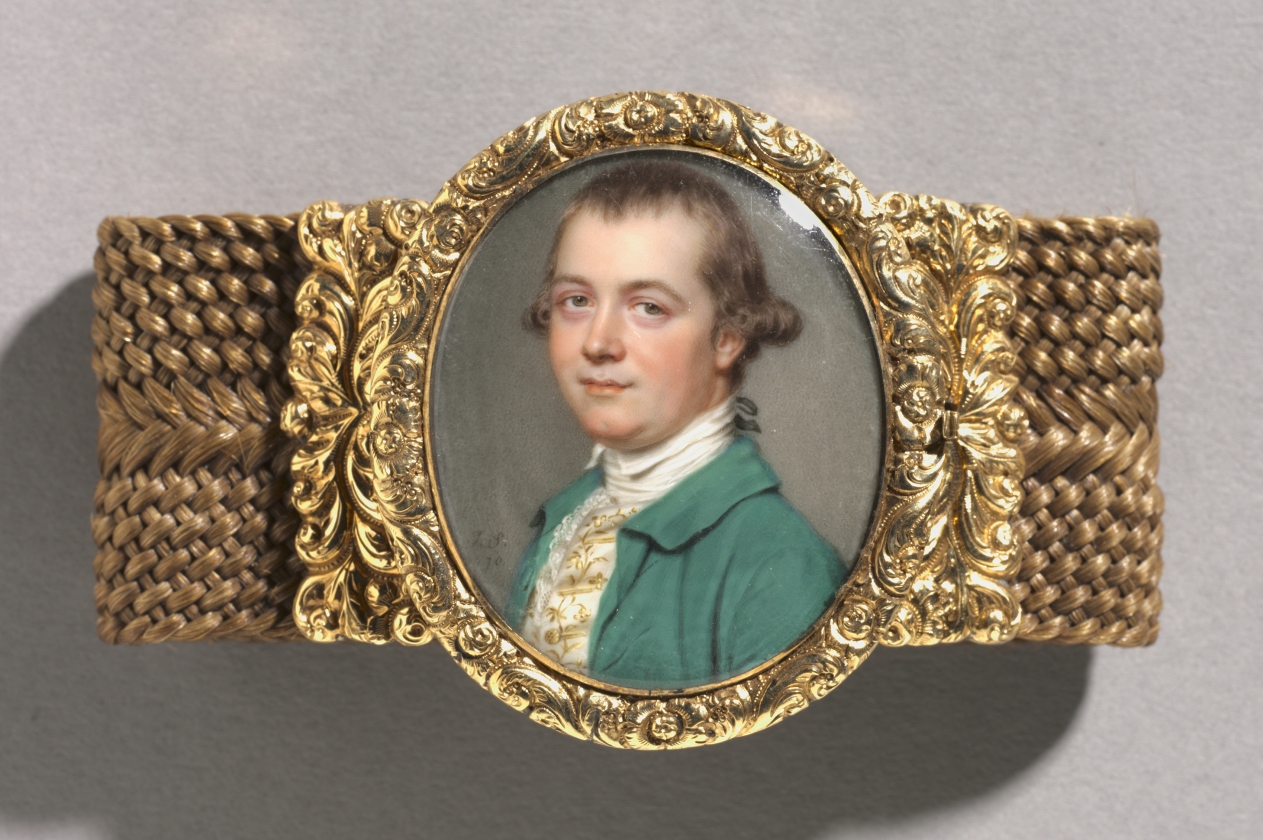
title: Portrait of Constantine Phipps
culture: England, 18th century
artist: John I Smart (British, 1741–1811)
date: 1770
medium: watercolor on ivory in a later gold and woven hair bracelet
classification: Portrait Miniature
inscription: signed lower left: J.S. / 1770.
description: John Smart painted the British gentleman Constantine Phipps (1746–1797) at the age of twenty-four, executing this portrait in 1770, the year following the death of the sitter’s father, Constantine Phipps (1710?–1769), and preceding his marriage to Elizabeth Tierney (d. 1832). Phipps the younger was the second son of a landowner and lived throughout England and France. In 1788 he moved his family to Caen, Normandy, hoping to educate his ten (eventually thirteen) children more economically. Phipps and his wife returned to England in 1792 to attend their daughter’s wedding. The escalating conflict between France and England prevented Phipps from returning to France where he had left eight children behind. Unfortunately, he did not see them before his death five years later. The portrait represents Phipps’s nearly full face. He has light brown eyes and natural brown hair worn en queue. He wears a green coat with a small collar, a white waistcoat embroidered with gold, and a high, white stock collar. Phipps is depicted against an olive-gray background. This early work by Smart already exhibits hallmarks of the artist’s style, such as the plain, gray background, the sitter’s colorful clothing, and his expressive eyes and slightly upturned mouth, which suggest that Phipps was a self-assured man with a sense of humor. The small format is also characteristic of the first decade of Smart’s career. This miniature is mounted in an elaborately carved gold frame on a bracelet made of gold and woven light brown human hair. The bracelet was executed later than the miniature and is in the style of the 1830s or 1840s. The inscription on the clasp reads “E. C. E. T. / Nov.r 29th 1838, aged 7” and may indicate that this bracelet was given to Constantine’s great-granddaughter Elizabeth Clarissa Emilie Toker (1831–1888) on her seventh birthday possibly by her mother or grandmother. There is a variant of this work in the Phipps collection in London. Painted in 1771, this miniature descended from Colonel Pownoll Phipps, the seventh child of Constantine Phipps, to John Constantine Phipps.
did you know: This miniature is mounted to a bracelet that was made at least 50 years later.